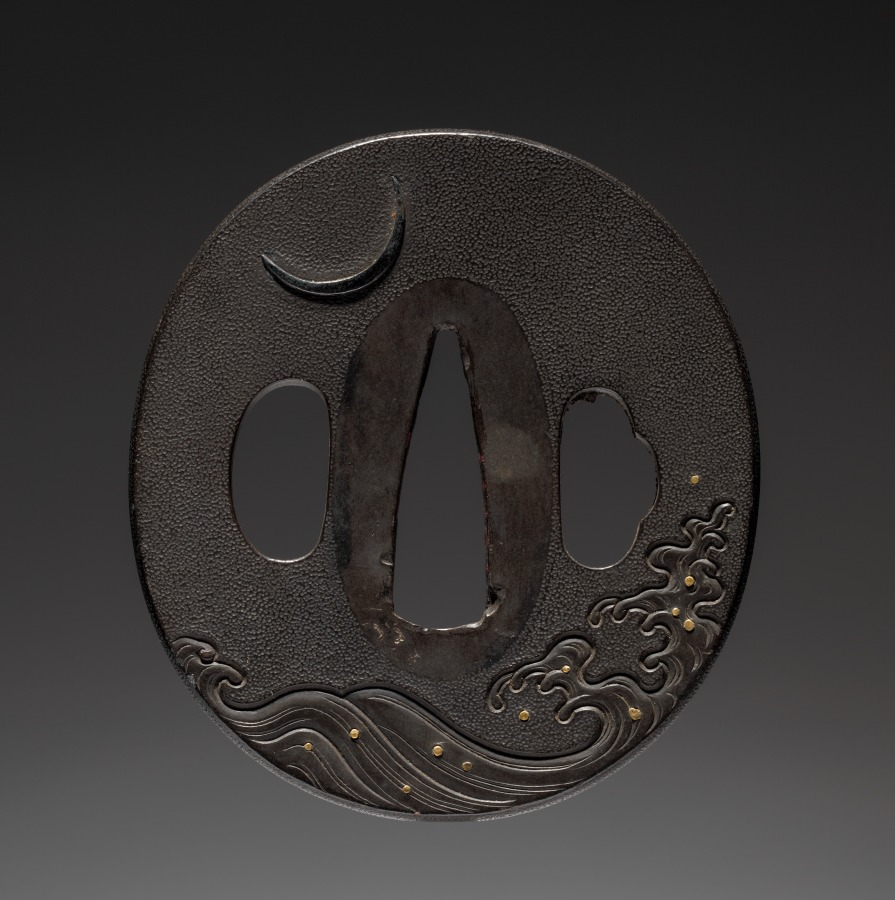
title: Sword Guard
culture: Japan, Edo period (1615–1868)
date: 1615–1868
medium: metal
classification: Arms and Armor